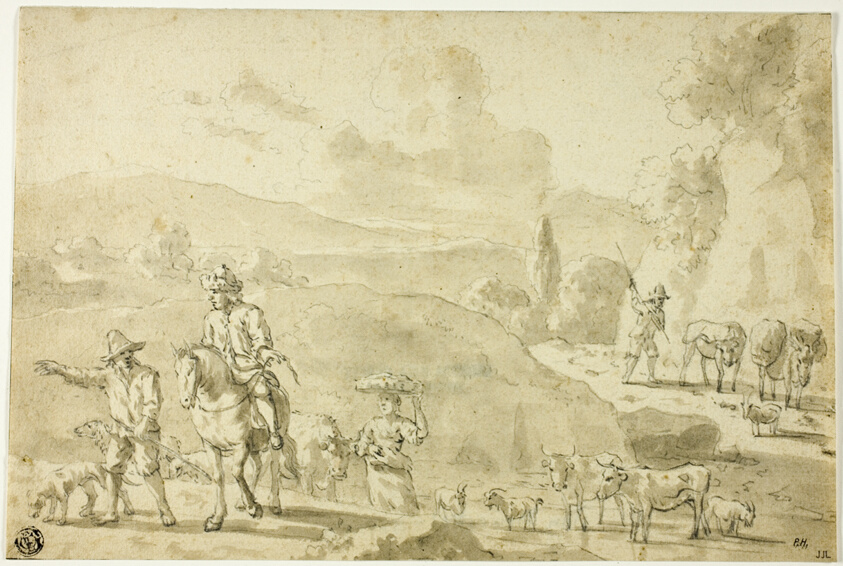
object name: Drawing and Watercolor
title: Cows, Sheep, Goats Being Herded, Herdsman Giving Directions to Traveler on Horseback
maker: Abraham Jansz. Begeyn (Dutch, 1637/38-1697)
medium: Graphite and brush and brown wash, on ivory laid paper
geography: Holland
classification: ink or chalk wash; drawings (visual works); prints and drawing